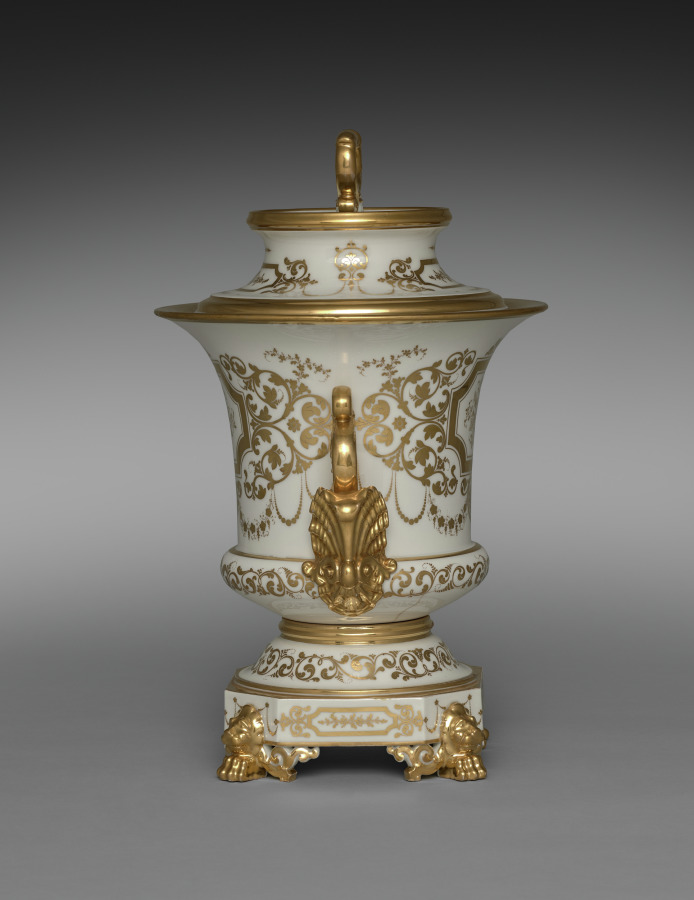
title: Covered Ice Cream Pail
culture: France, Paris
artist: Factory of Jacob-Petit (French, 1830–1865)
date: c. 1840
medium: gilt porcelain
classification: Ceramic